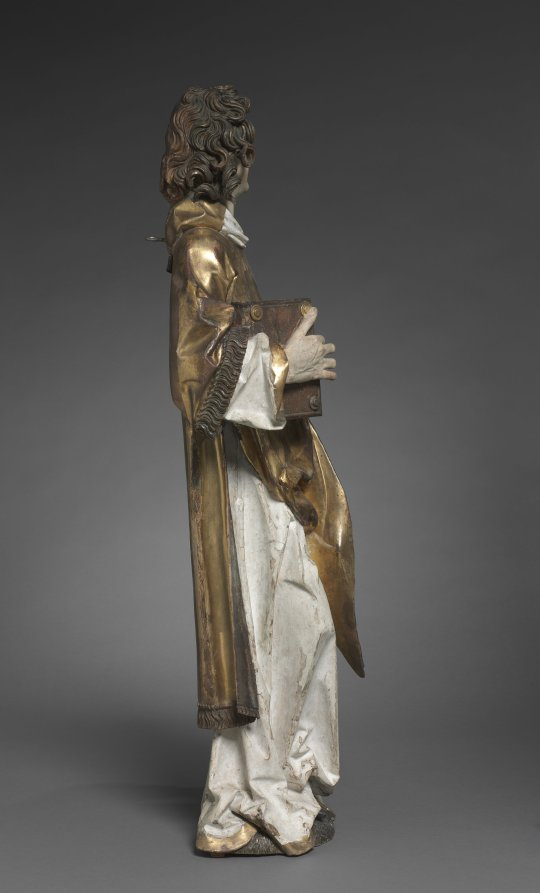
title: Saint Stephen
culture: Germany, Würzburg, 16th century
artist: Tilman Riemenschneider (German, active Würzburg, c. 1460–1531)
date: 1502–8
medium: lindenwood with polychromy and gilding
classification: Sculpture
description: This sculpture, along with that of Saint Lawrence (1959.42) and two others in Germany, are believed to be the remaining fragments of a large altarpiece carved by Riemenschneider for the Dominican convent in Rothenburg in Franconia (demolished in 1813). Saints Stephen and Lawrence both wear the dalmatic to indicate their status as deacons in the early church. Each holds a symbol of his martyrdom; here, Saint Stephen cradles some stones to indicate his death by stoning. Art in Germany through the early 1500s remained firmly anchored in the late Gothic style with its associated interests in realism. Riemenschneider was one of the most prolific and versatile sculptors of this style, a recognized master in both stone and wood. His flourishing workshop employed as many as 40 apprentices in sculpting, woodcarving, and painting. His sculptures are noted for the dreamy, melancholy, and introspective quality in their expressions, as well as their remarkable attention to detail.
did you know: Tilman Riemenschneider (c. 1460–1531) is probably the most famous German sculptor of the period around 1500.